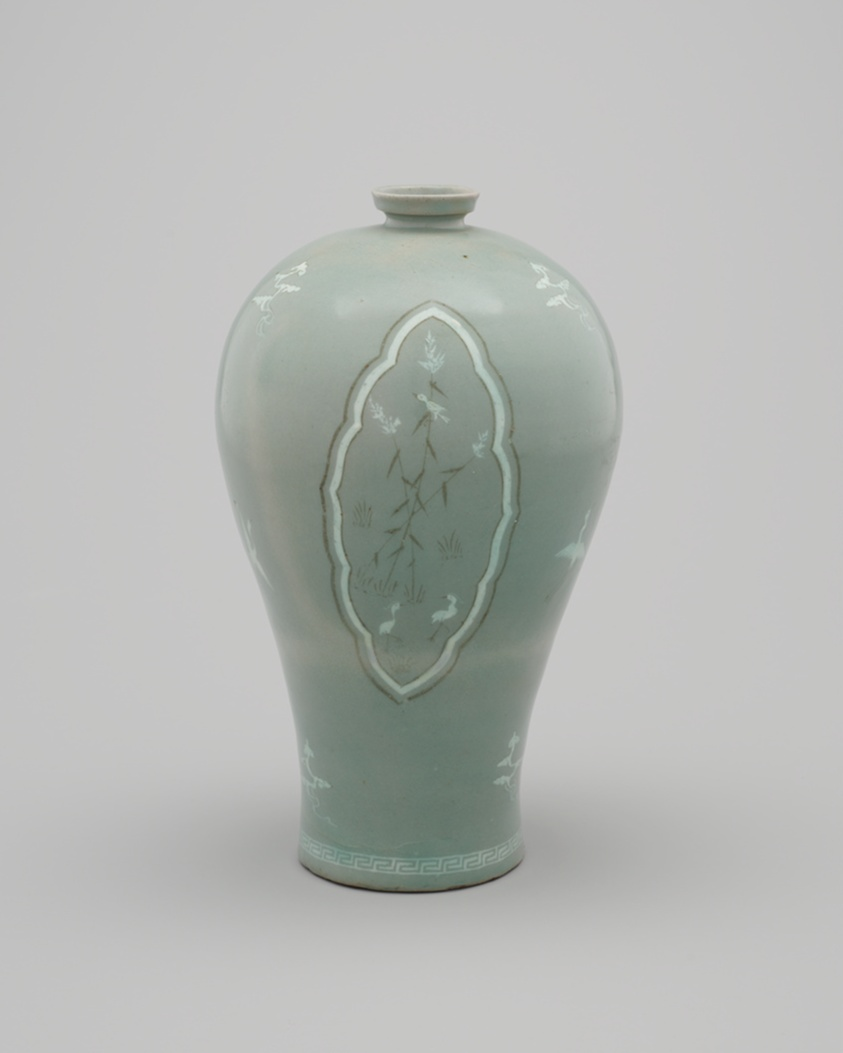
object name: Vessel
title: Plum Vase (Maebyeong) with Clouds, Cranes, and Children Motifs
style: Korean (culture or style), koryŏ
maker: Korea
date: Goryeo dynasty (918–1392), late 12th century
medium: Stoneware with red and white slip and celadon glaze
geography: Korea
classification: vase; vessel; stoneware; ceramics; asian art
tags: children, green (color), clouds, cranes, birds, animals, trees, plants, bamboo